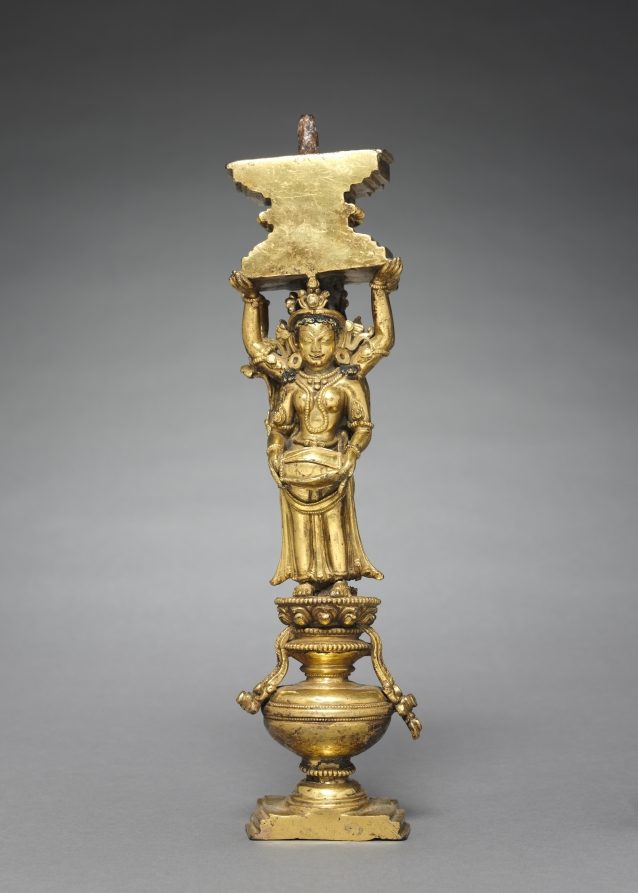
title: Support with Addorsed Figures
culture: Tibet, Densatil Monastery, 15th century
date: 1400s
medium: gilt bronze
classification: Sculpture